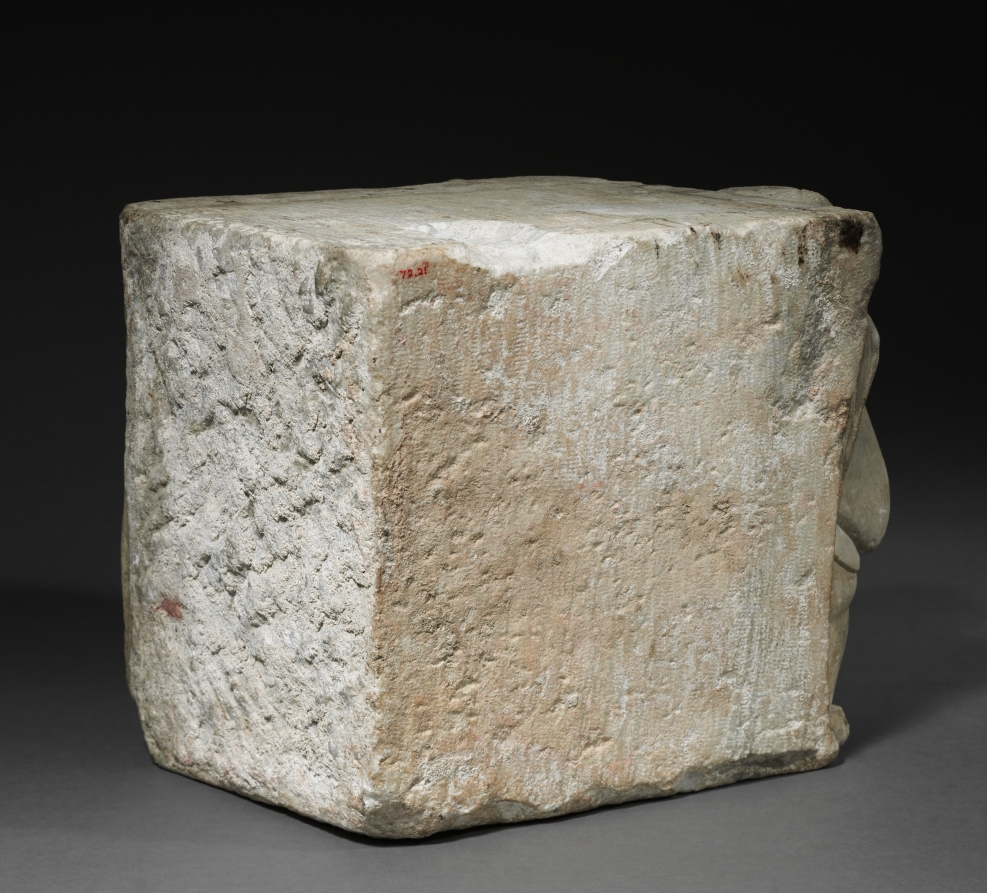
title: Engaged Capital with Figures of a Man and of an Eagle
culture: Northern Italy, Emilia (Bologna?), 12th century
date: 1175–1200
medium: marble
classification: Sculpture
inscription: face with half-figure of an angel with Gosepl bears the inscription: S. MAT; face with an eagle holding Gospel bears the inscription: S. IOHS. EVA.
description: These creatures, as indicated by their Latin inscriptions, are symbols personifying the Evangelists Matthew (man) and John (eagle). This iconography derives from the Book of Revelation.